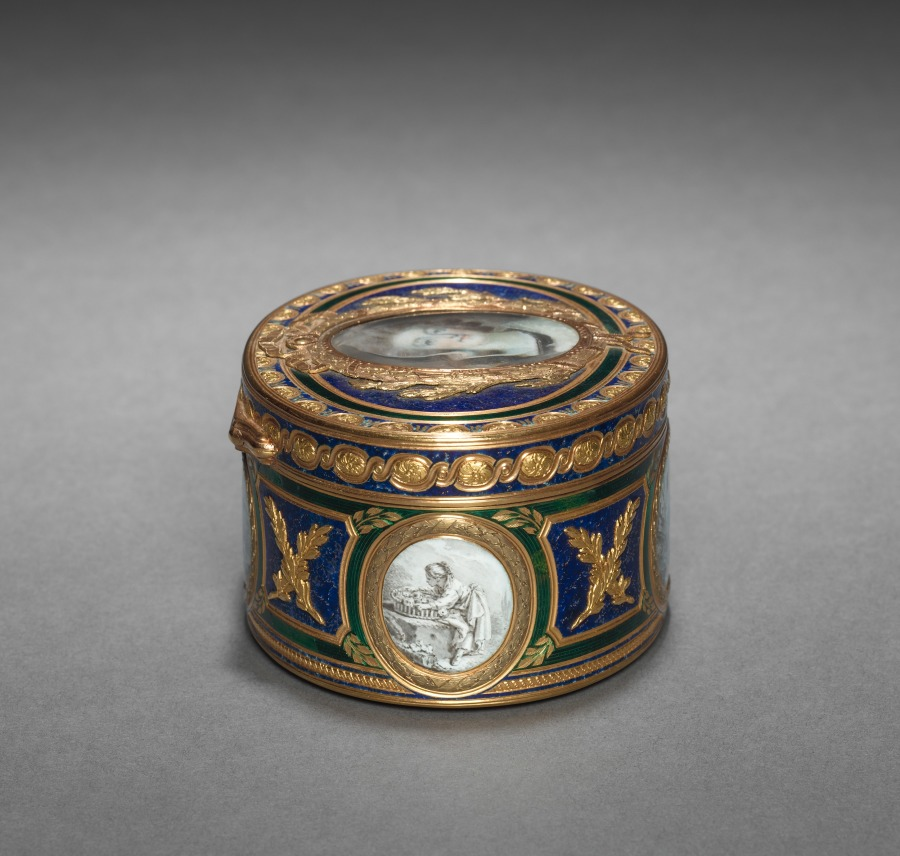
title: Snuff Box (Tabatière) with Portrait of Marie Antoinette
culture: France, 18th century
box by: Pierre-François-Mathis de Beaulieu (French)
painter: François Dumont (French, 1751–1831)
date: 1768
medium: watercolor on ivory in a gold and enamel box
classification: Enamel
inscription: [Maker's mark of Pierre-François-Mathis de Beaulieu, master goldsmith in 1768, inside cover]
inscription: [Charge mark of Jean-Jacques Prévot, 1762-1768, inside cover]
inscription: [Warden's mark of Paris, 1768-1769, inside cover]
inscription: [Discharge mark of Julien Alaterre, Paris, 1768-1774, on neck at right]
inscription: [Inside box, the letter]: "F"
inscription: [On bezel at left, engraved number]: "627"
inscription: [On front of bezel, engraved signature]: "Ve Georges Beaulieu à Paris"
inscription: [On right of miniature portrait, the letter]: "D"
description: This box was created through the collaboration of two skilled and well-known artisans of the period, master goldsmith Pierre-François-Mathis de Beaulieu and celebrated miniature painter François Dumont. The portrait of Marie Antoinette on the box's lid is painted in Dumont’s own style while those on the sides and bottom of the box take inspiration from the work of painter François Boucher, known for his pastoral scenes in the Rococo style.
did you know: Marie Antoinette, queen consort of French King Louis XVI and great patron of the decorative arts, was executed in 1793 at the end of the French Revolution.